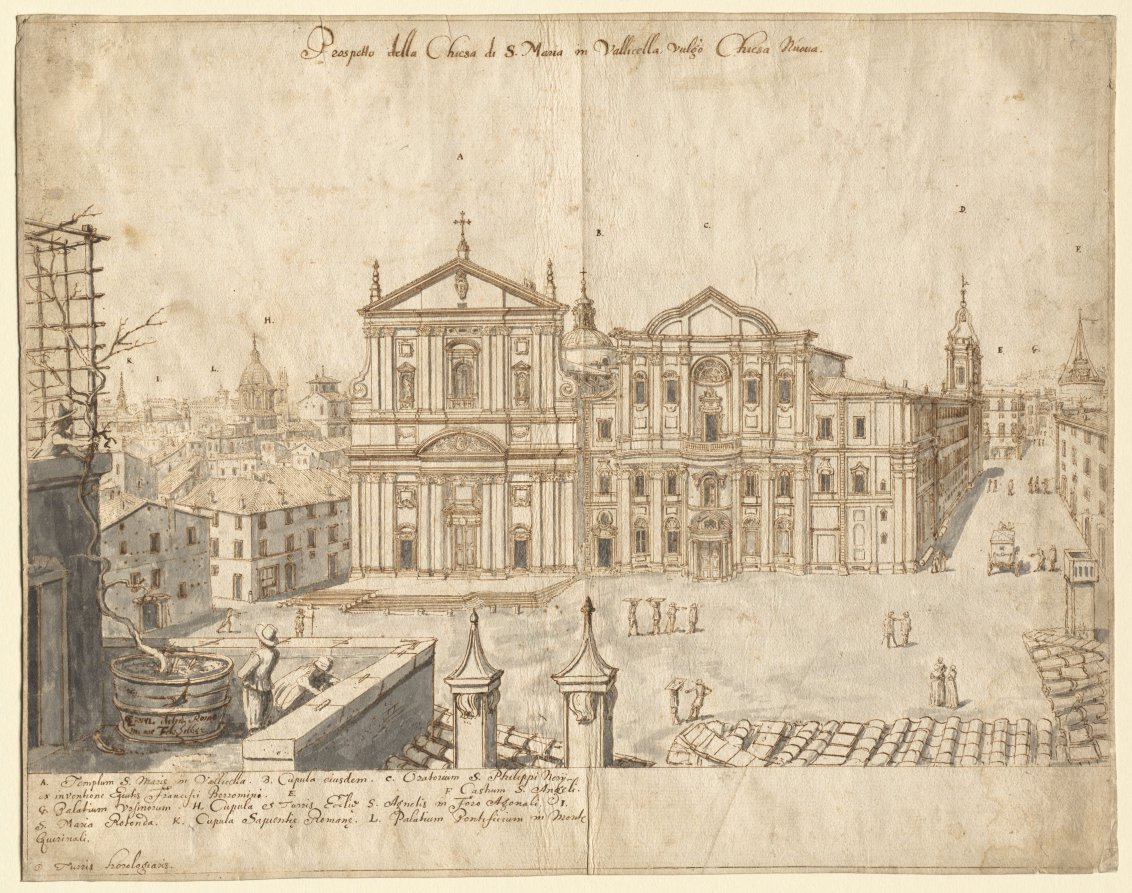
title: Eighteen Views of Rome: The Church of Santa Maria in Vallicella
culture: Flanders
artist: Lievin Cruyl (Flemish, c. 1640-c. 1720)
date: 1665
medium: pen and brown ink and brush and gray wash over graphite; framing lines in brown ink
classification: Drawing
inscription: signed, lower left, in brown ink: [artist's monogram: LC] RVYL delin Romæ / mense Febr. 1665. ; by artist, upper center, in brown ink: Prospetto della Chiesa di S. Maria in Vallicella vulgò Chiesa Nuova ; by artist, throughout composition, in brown ink: [the letters A-L] ; by artist, lower left, in brown ink: A. Templum S. Mariæ in Vallicella. B. Cupula eiusdem. C. Oratorium S. Phiilippi Nerij / ex inventione Equitis Francisci Borromini. E. F. Castrum S. Angeli. / G. Palatium Ursinorum. H. Cupula et Turris Eccliæ S. Agnetis in Foro Agnoli. I. / S. Maria Rotonda. K. Cupula Sapientiae Romanae. L. Palatium Ponteficium in Monte / Quirinali. / D. Turris horologiaris ; VERSO, upper left, in black chalk: 545 ; ON STRIPS OF PAPER MOUNTED TO VERSO, lower center, in graphite: A20979 ; lower right, in graphite: E. 13